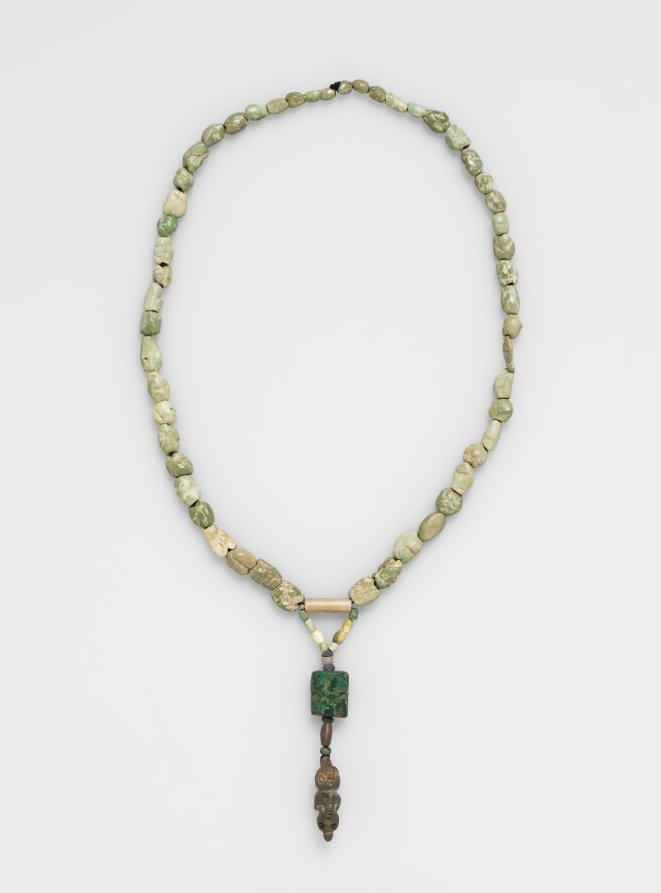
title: Necklace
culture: Peru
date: before 1532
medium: turquoise and stone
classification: Jewelry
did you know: These ancient beads were restrung in modern times.